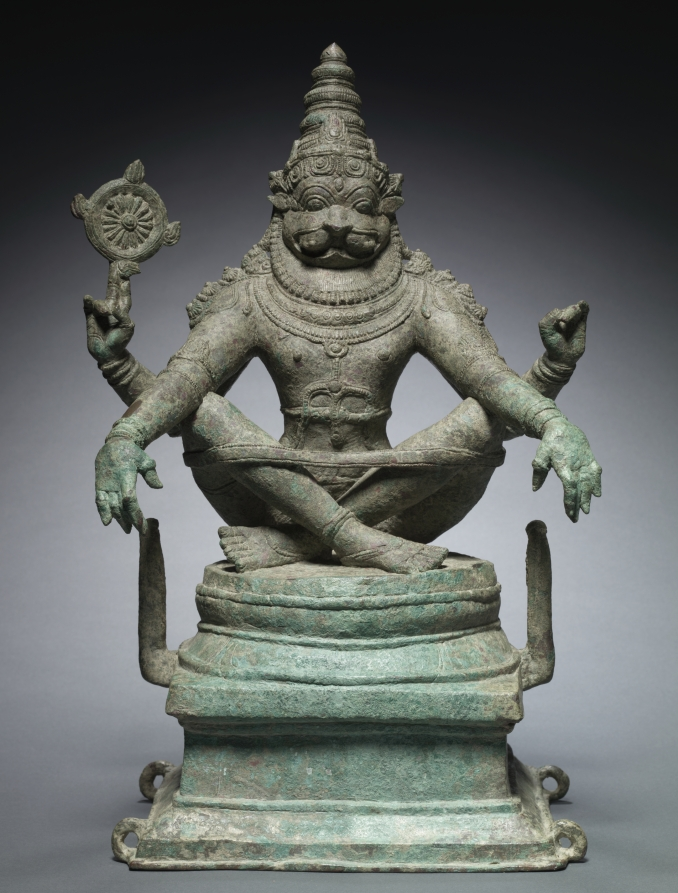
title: Yoga Narashimha, Vishnu in his Man-Lion Avatar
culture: South India, late Chola Period (900-13th Century)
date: c. 1250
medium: bronze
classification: Sculpture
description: The two posts on either side are for holding a halo that once encircled the figure.